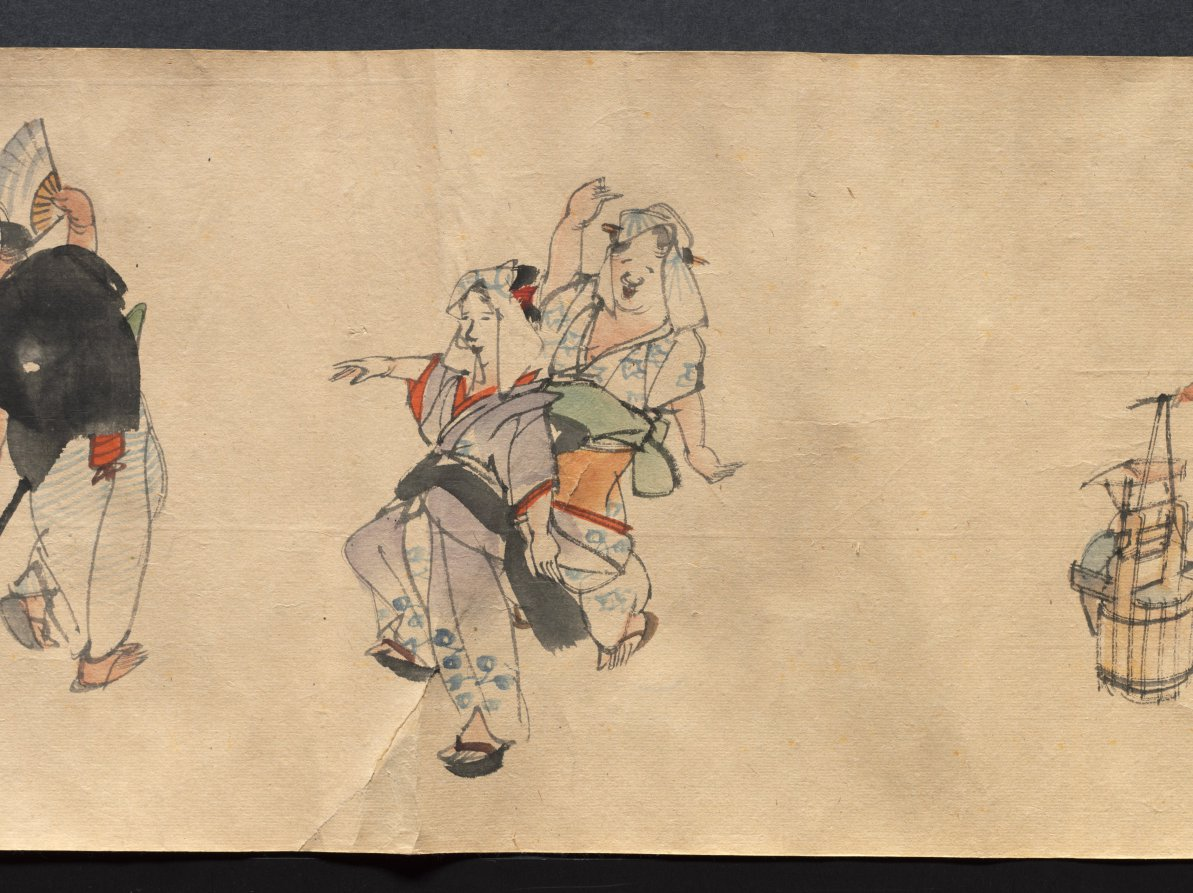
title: Festival Scenes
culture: Japan, Edo period (1615–1868)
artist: Suzuki Nanrei (Japanese, 1775–1844)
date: c. 1795–1844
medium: handscroll; ink and color on paper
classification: Painting